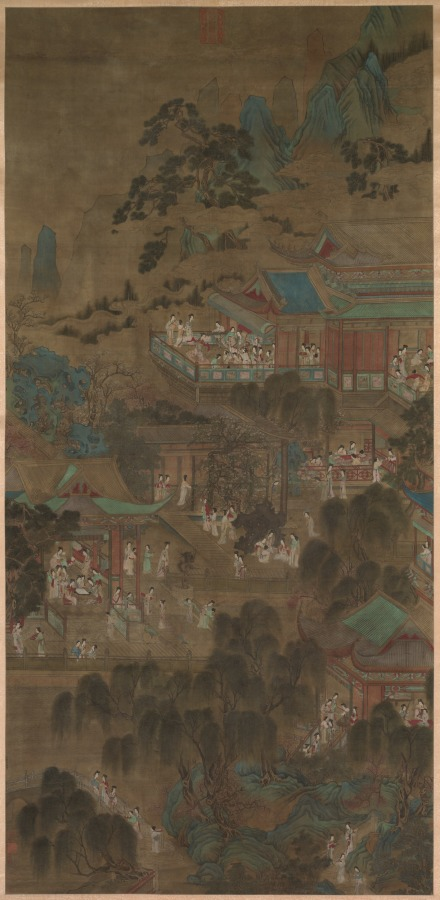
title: Court Ladies in the Imperial Palace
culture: China, Yuan dynasty (1271-1368)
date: 1271–1368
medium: hanging scroll, color on silk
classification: Painting